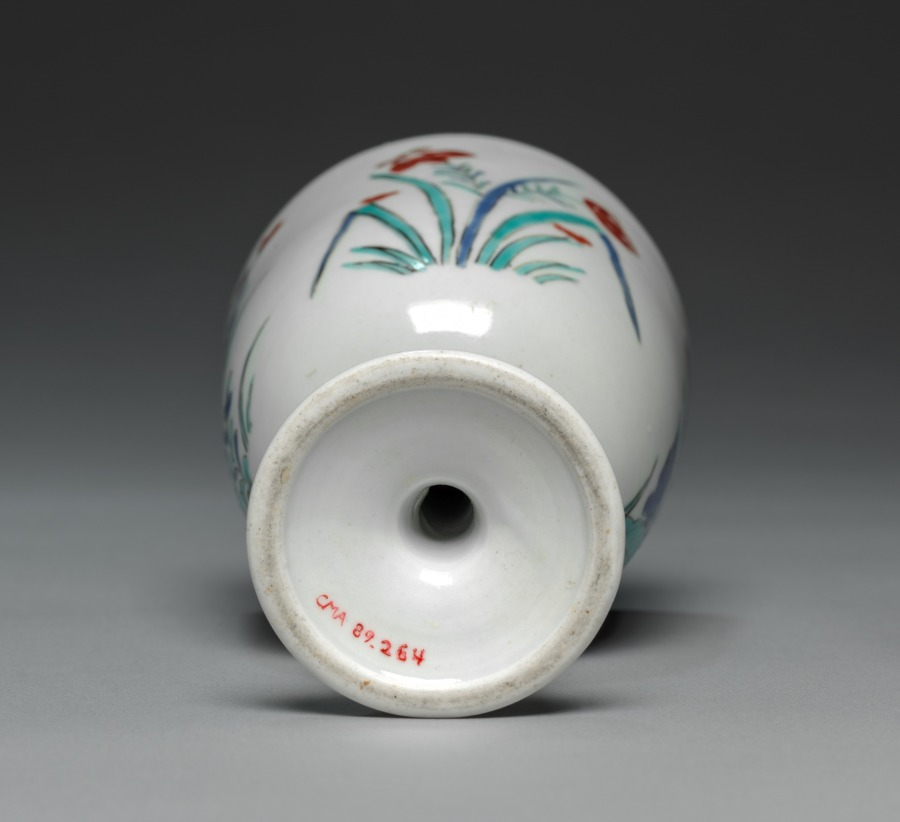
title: Goblet with Flowers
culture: Japan, Edo period (1615–1868)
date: c. 1700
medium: porcelain with overglaze color enamel and gold (Hizen ware Ko-Imari style)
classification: Ceramic